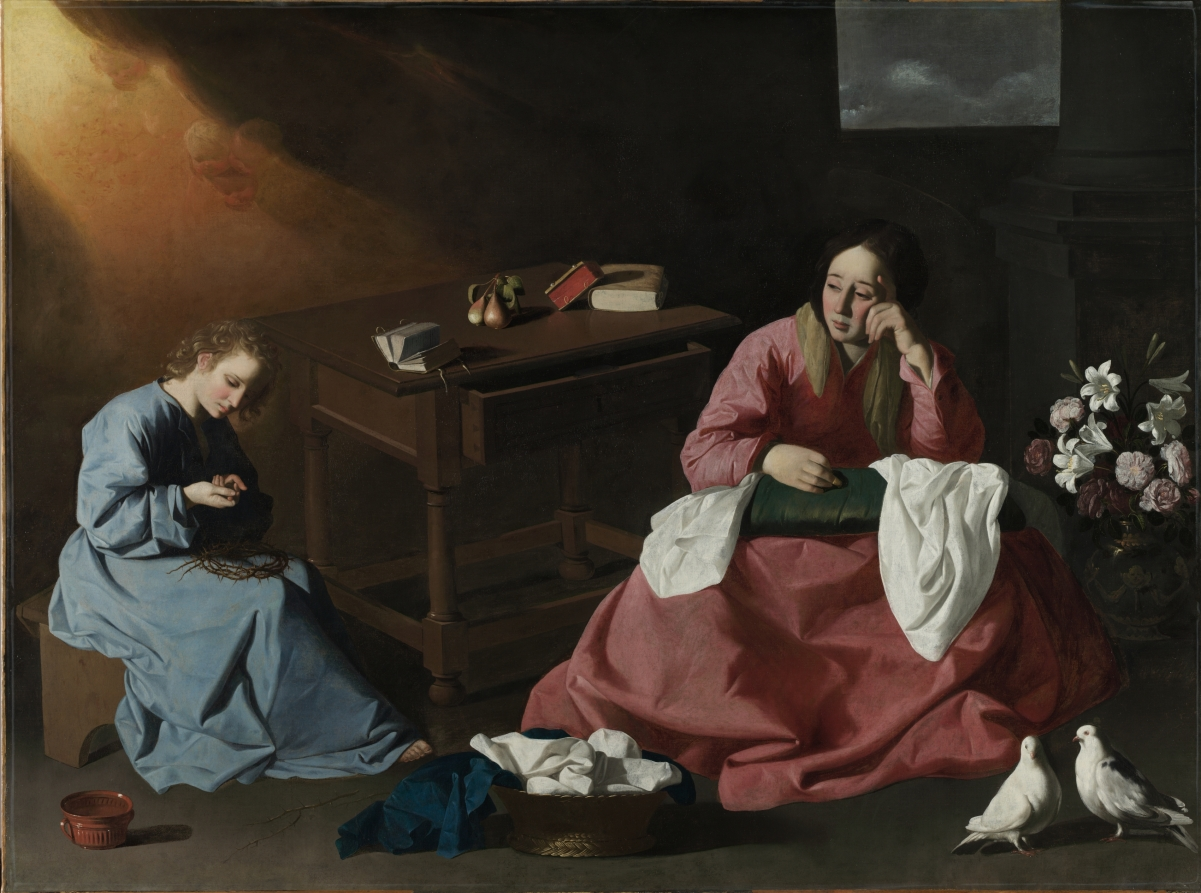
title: Christ and the Virgin in the House at Nazareth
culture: Spain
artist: Francisco de Zurbarán (Spanish, 1598–1664)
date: c. 1640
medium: oil on canvas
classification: Painting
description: Stories of Christ’s childhood and adolescence became increasingly popular during the Counter-Reformation because they were easily understood by a broad public. Rather than taking a story from the Bible, Zurbarán appears to have invented this subject, in which Jesus pricks himself on a crown of thorns he is weaving, foretelling his later torment at the Crucifixion. Despite the grand scale and monumental figures, the work has remarkable intimacy and quietness, emphasizing such details as the Virgin’s tears.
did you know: Zurbarán, also a still-life painter, tilts the tabletop to emphasize the symbolic books and fruit.